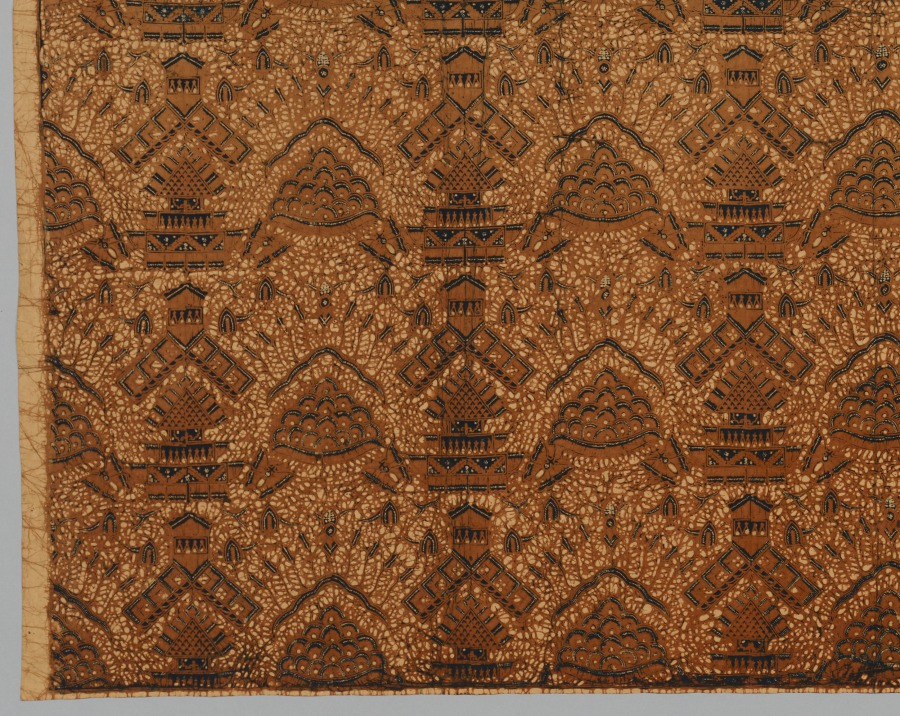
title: Wearing Cloth (Kain Pajang)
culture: Indonesia, Central Java, 20th century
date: 1900–1955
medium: resist printed cotton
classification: Textile